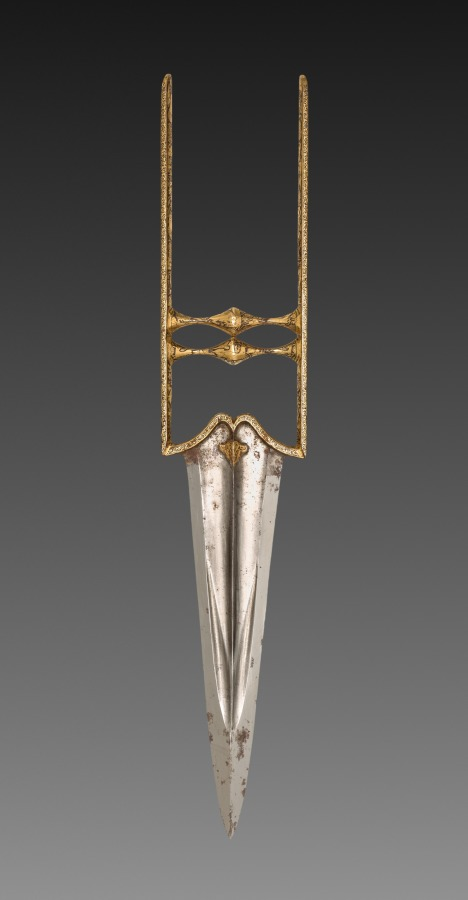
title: Katar (Stabbing Dagger)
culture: India, Mughal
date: 1700s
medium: Iron handle with gold inlay; steel blade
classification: Arms and Armor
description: Stabbing daggers called katar were distinctive to India and often worn by soldiers and courtiers, tucked into their belts. Covering the entire handle are tiny scenes of lions and cheetahs hunting deer and buffalo in rocky wooded settings.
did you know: The ornament on the handle faces up from the perspective of a right-handed user, on all sides.